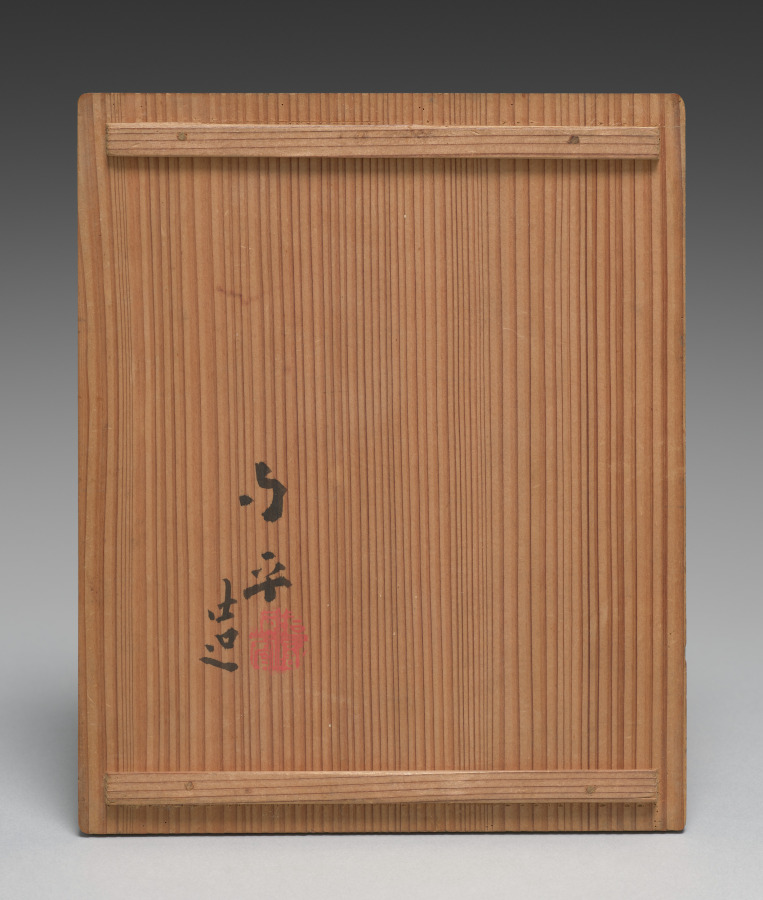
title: Nesting Dishes with Scattered Pine Needles and Maple Leaves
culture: Japan, Edo period (1615–1868)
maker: Seifū Yohei I (Japanese, 1801–1861)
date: 1861–78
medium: Pair of dishes; stoneware with underglaze blue, iron oxide, slip, and crackled glaze, and overglaze color enamel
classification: Ceramic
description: Seifū Yohei I made both blue and white porcelains after Ming dynasty (1368–1644) Chinese wares fired in the kilns at Jingdezhen for export. He also made colorful stoneware in the style of his teacher, Nin’ami Dōhachi (Takahashi Dōhachi II) (1783–1855).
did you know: The combination of the blue and brown for the needles imparts a sense of depth to the design, with the blue needles apparently at a greater distance.